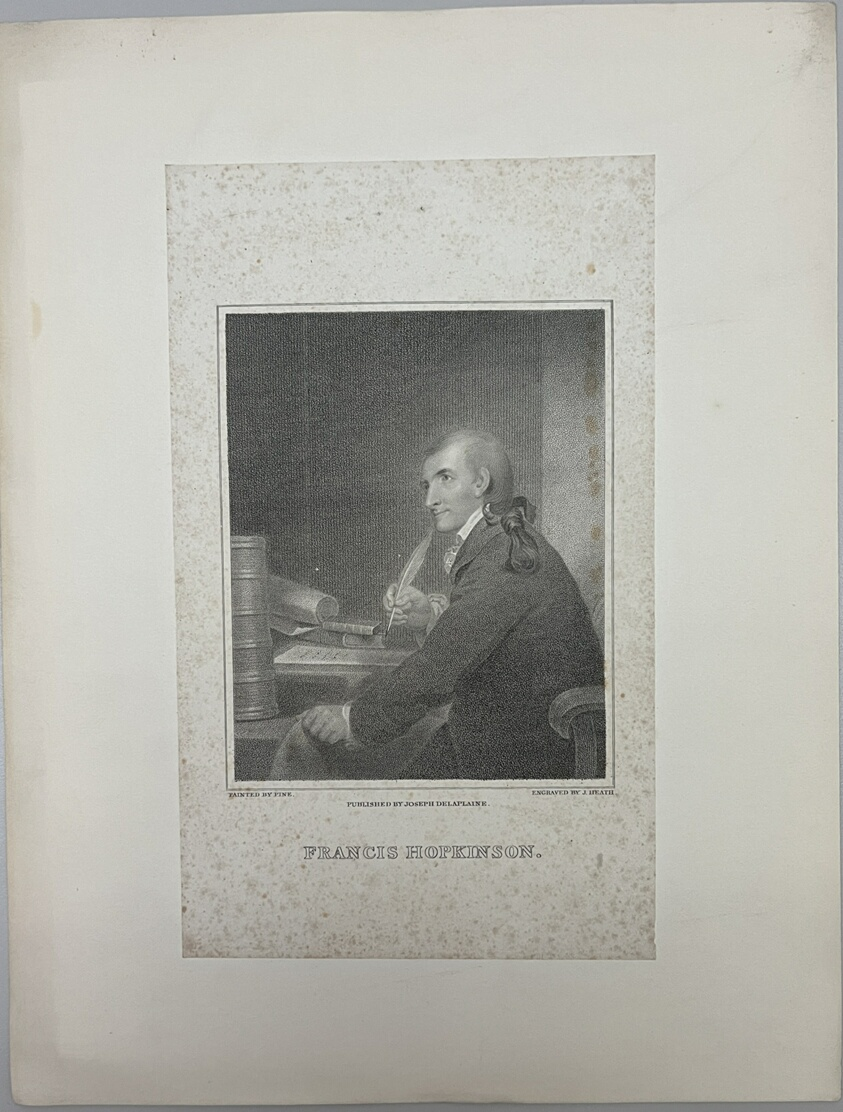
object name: Print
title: Francis Hopkinson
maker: James Heath (English, 1757-1834); after Robert Edge Pine (British, 1742-1788); published by Joseph Delaplaine (American, 1777-1824)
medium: Stipple etching on paper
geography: United States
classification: reproduction; print; prints and drawing